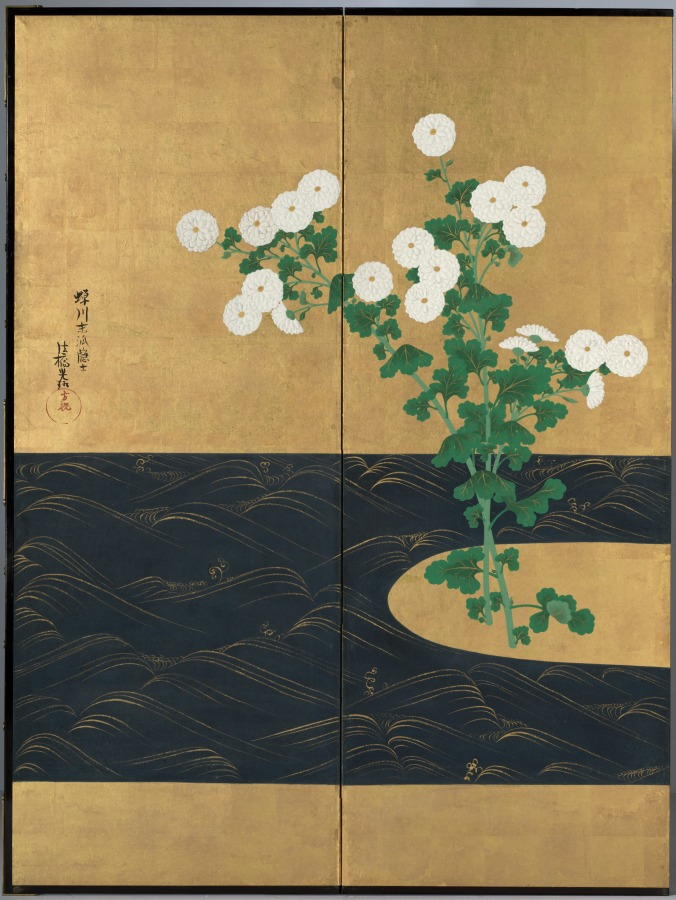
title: Chrysanthemums by a Stream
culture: Japan, Edo period (1615–1868)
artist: possibly by Ogata Kōrin (Japanese, 1658–1716)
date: c. 1715–30 or after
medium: One of a pair of six-panel folding screens; ink and color on gilded paper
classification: Painting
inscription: the signature and seal of Korin, "sensen mappa (makko) inshi hokyo Korin" (late generation hermit of the Kamo stream tradition) is written in two lines. A circular seal which reads "Hoshuku" is at the end of the second line on the edge of the first panel from the right.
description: These screens recall a painting style so closely identified with Ogata Kōrin (1658–1716) that it is called Rinpa, or “Rin School,” after the ideograph “rin” in his name. The highly stylized background accentuates floral groupings that have been groomed so as to appear utterly artificial, like the synthetic arrangements available today. Kōrin's genius derived in large measure from natural phenomena painstakingly observed and then manipulated to create compositions of startling refinement and sparkling isolation. This process may have grown out of Kōrin's early immersion in the family textile business, a medium that encourages such dramatic distillations of form: the stream's gold-crested waves bring to mind traditional kimono robe designs of Kōrin's era. Works with the signature seen on this painting, including a style name, or persona suggested to Kōrin by his brother Kenzan (1663–1743), are sometimes considered to have been produced either in the last year of his life, when he was very ill, or after his death. In both scenarios, the lion’s share of the work would have been done by studio assistants, but little is truly known of his studio practice. Given the regularity of the gold waves on the stream, and the tension in the arrangement of the chrysanthemums, it is also possible that the screens were made in emulation of Kōrin's designs by a later artist.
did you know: The signature used on these screens may indicate paintings made in the last year of the artist's life, or works completed by his studio after his death.